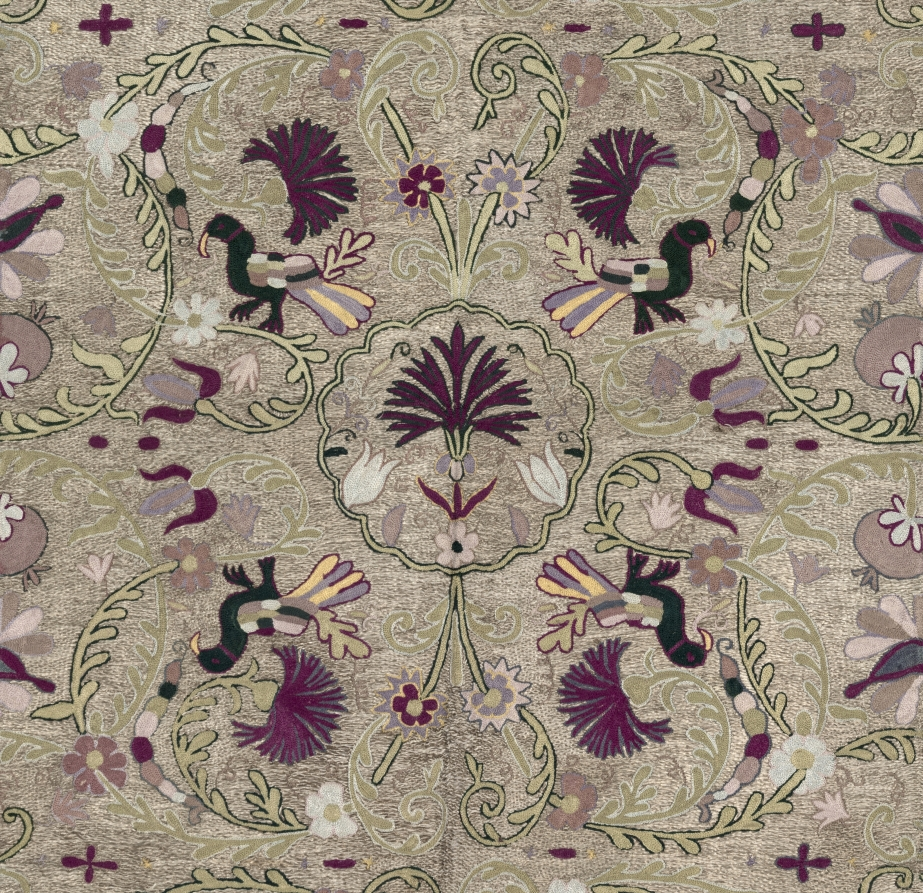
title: Coverlet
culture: India, 19th century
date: 1800s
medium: embroidery; silk and gold filé on linen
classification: Embroidery